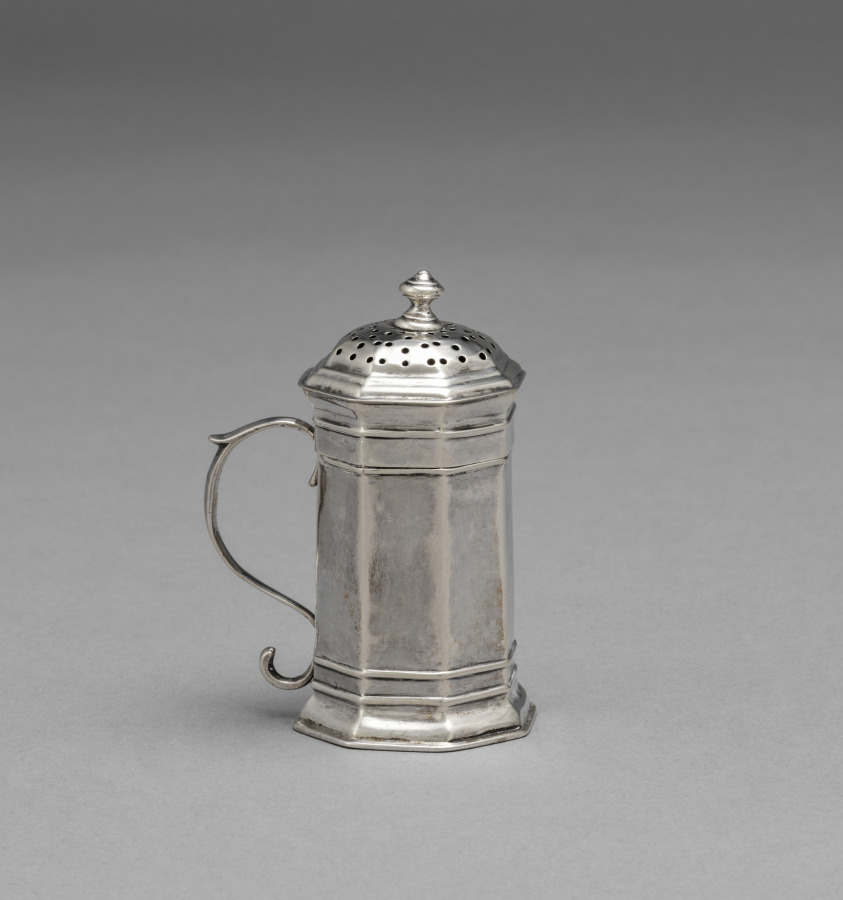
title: Caster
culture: America, Massachusetts, Boston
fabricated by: John Burt (American, 1693–1746)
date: c. 1735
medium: silver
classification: Silver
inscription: engraved "John Basset" in block capital letters and script lower-case letters and "M*B" on bottom.